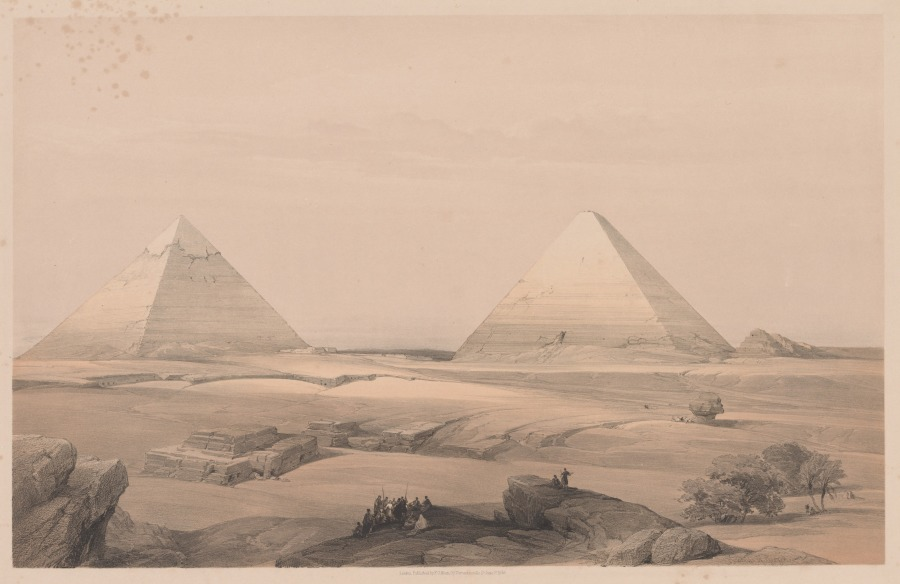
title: Egypt and Nubia: Volume I - No. 3, Pyramids of Gizeh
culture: England, 19th century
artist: Louis Haghe (British, 1806–1885)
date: 1838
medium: color lithograph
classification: Print